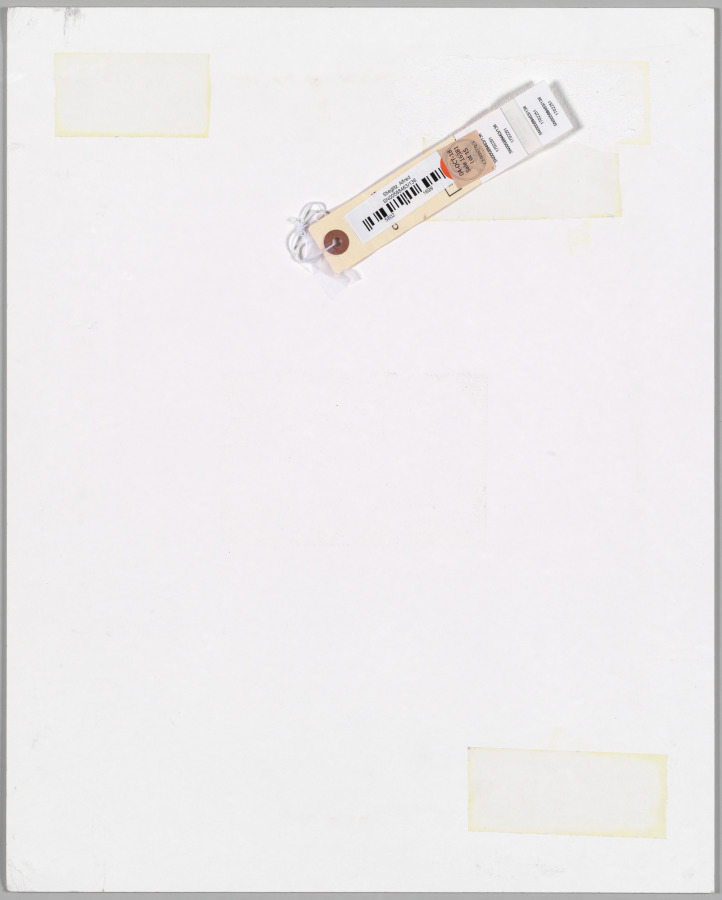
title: The Steerage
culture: America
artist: Alfred Stieglitz (American, 1864–1946)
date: 1907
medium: photogravure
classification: Photograph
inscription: Written in pencil on recto of mount in lower left: “The Steerage-1907/original Photogravure/Alfred Stieglitz (signed)”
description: With his camera, Stieglitz transformed a scene of impoverished immigrants returning to Europe into a study in shape and form; the image sparked his evolution from a pictorialist into a modernist. Reflecting on his career in 1942, Stieglitz proclaimed this image, taken in 1907, as an achievement of modern art that anticipated Cubism.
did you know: This print is Alfred Stieglitz’s own, lifelong copy of The Steerage, one of his most important works.